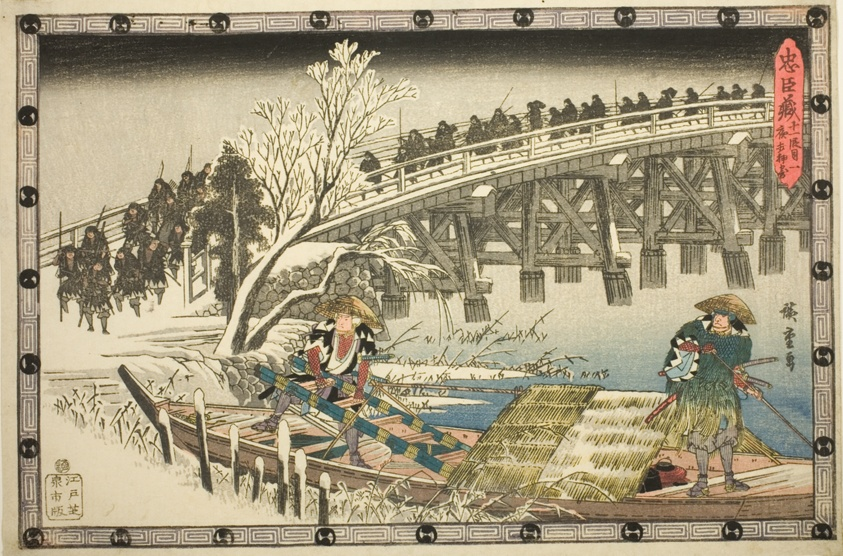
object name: Print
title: Act 11, Part 1: The Approach to the Night Attack (Juichidanme ichi, yochi oshiyose), from the series "The Revenge of the Loyal Retainers (Chushingura)"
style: Japanese (culture or style)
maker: Utagawa Hiroshige 歌川 広重; Japanese, 1797-1858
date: c. 1834/39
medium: Color woodblock print; oban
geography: Japan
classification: woodblock print; print; asian art